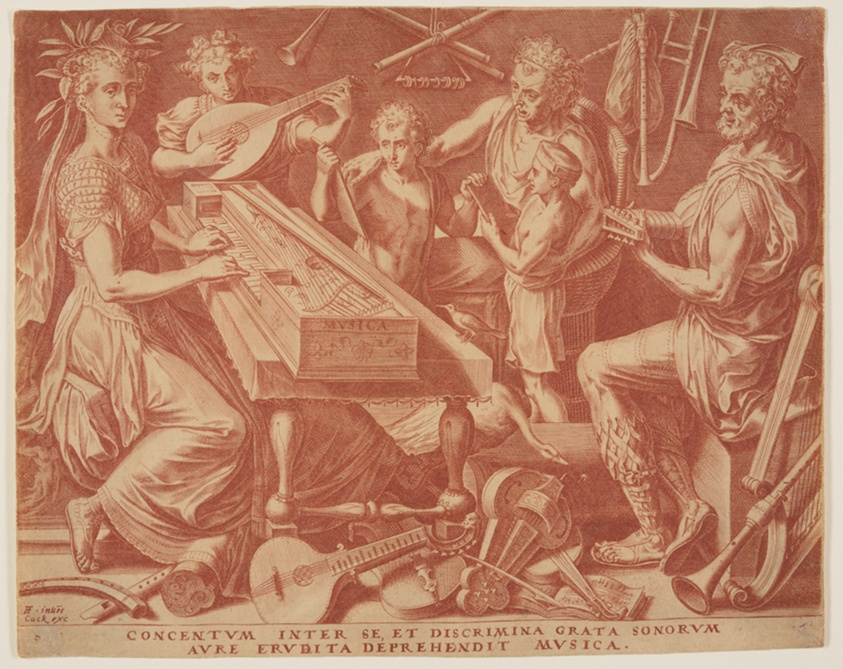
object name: Print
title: Music from The Seven Liberal Arts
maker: Cornelis Cort (Netherlandish, 1533–before 1578); after Frans Floris I (Netherlandish, 1519/20–1570)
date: 1565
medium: Engraving in red on ivory laid paper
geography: Netherlands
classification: print; paper; prints and drawing; engraving